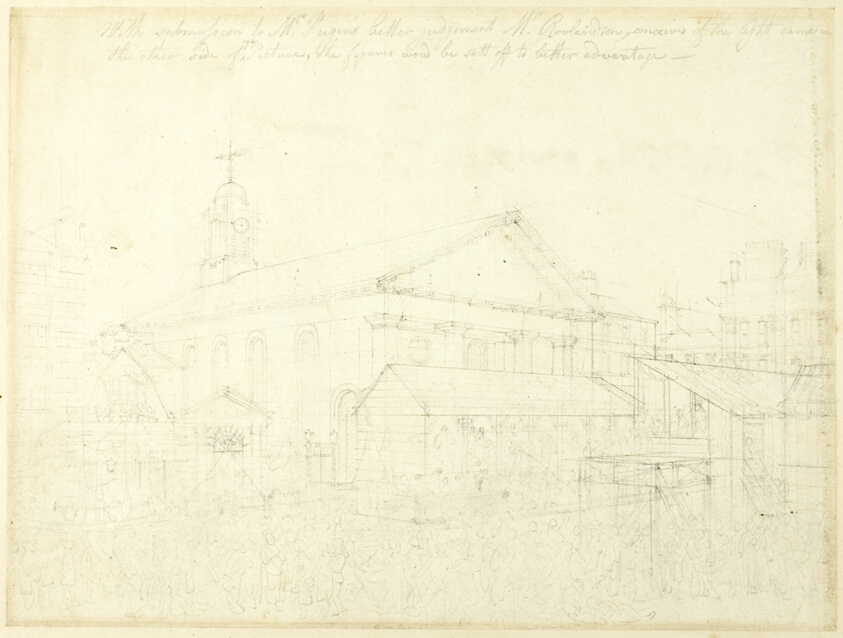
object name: Drawing and Watercolor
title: Study for Covent Garden Market, Westminster Election, from Microcosm of London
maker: Augustus Charles Pugin (English, born France, 1762-1832); Thomas Rowlandson (English, 1756-1827)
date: c. 1808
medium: Graphite on ivory wove paper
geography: England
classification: graphite; drawings (visual works); prints and drawing